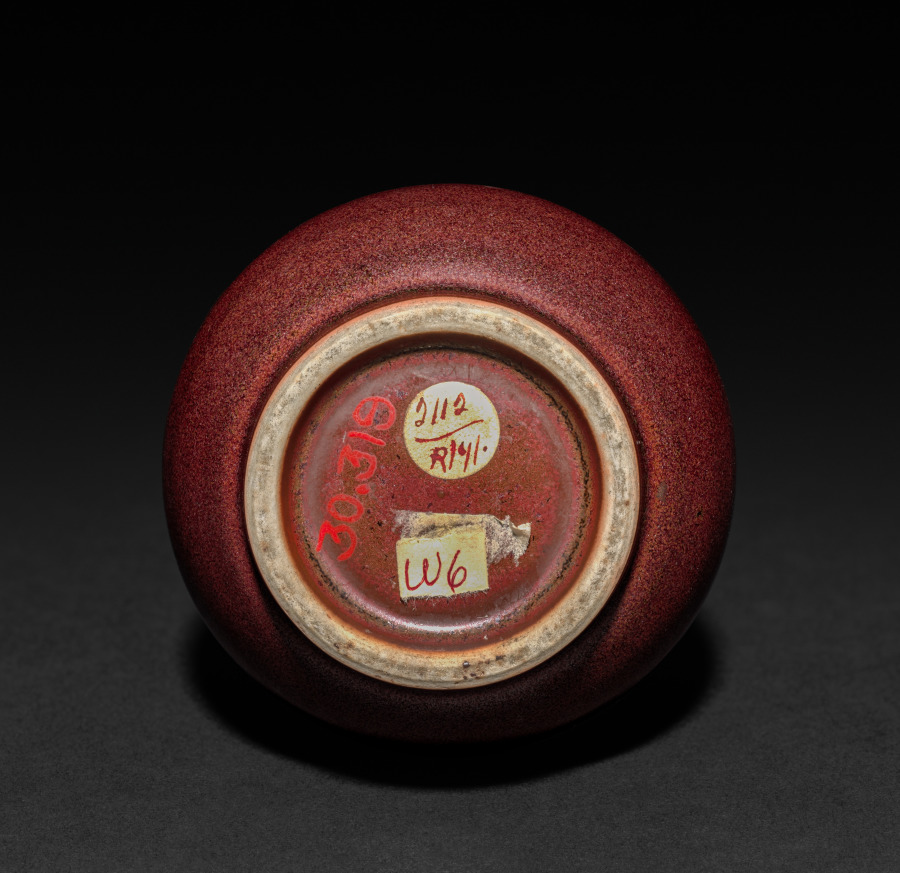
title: Bottle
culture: China, Qing dynasty (1644–1911), Qianlong reign (1736–95)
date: 1736–95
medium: porcelain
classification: Ceramic